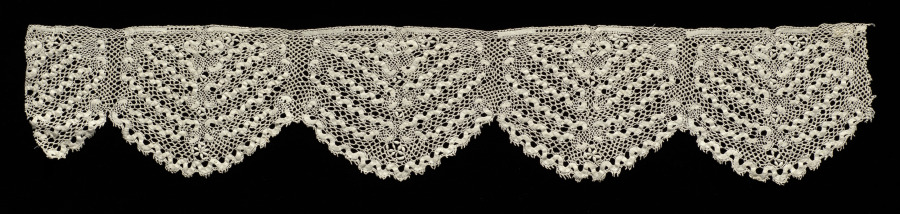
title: Lace Edging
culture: Central Europe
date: 1800s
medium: Linen: bobbin lace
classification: Lace